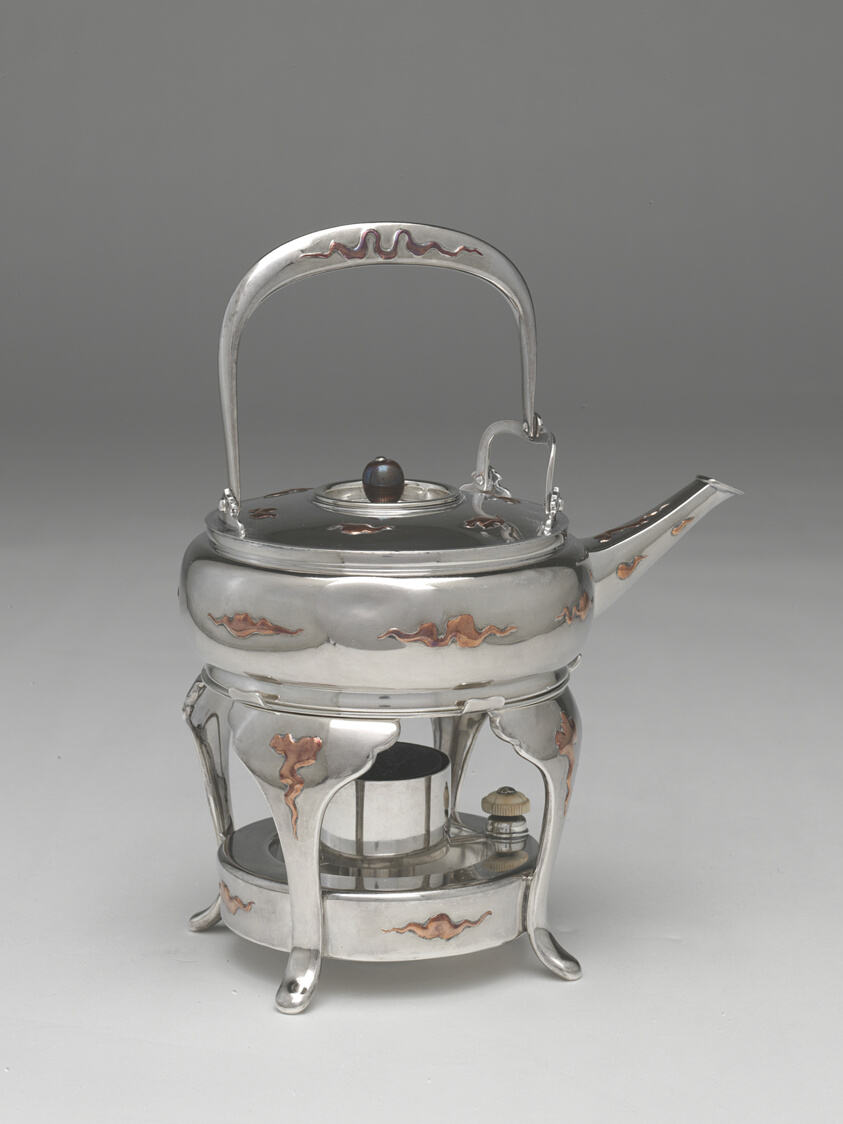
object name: Metalwork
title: Teakettle and Stand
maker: Design attributed to Edward C. Moore (American, 1827–1891); Tiffany and Company (American, founded 1837); New York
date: tea kettle: 1877; stand: 1889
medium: Silver with copper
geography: New York City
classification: kettle (vessel); teaware; silver; american decorative arts; american arts; decorative arts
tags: dining, drinking